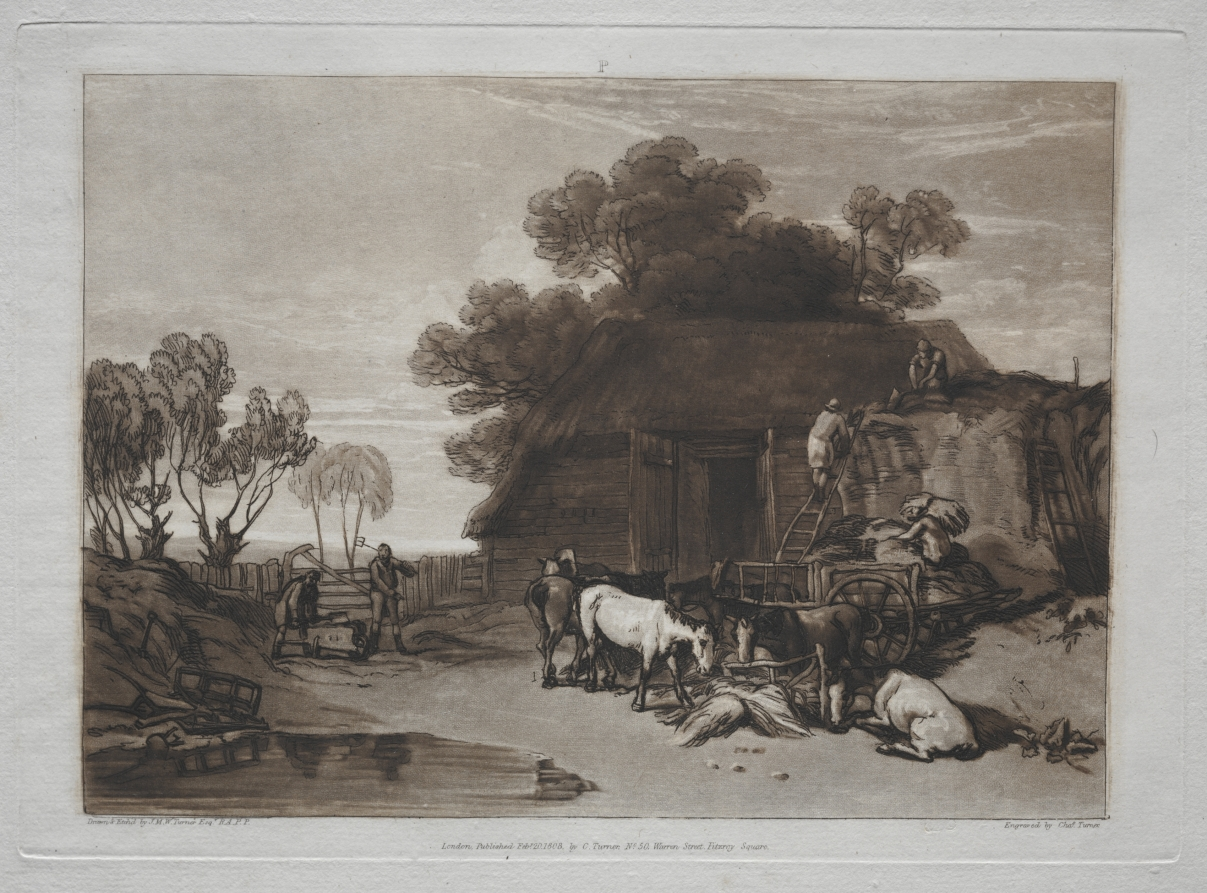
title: Liber Studiorum: The Straw Yard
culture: England, 19th century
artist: Joseph Mallord William Turner (British, 1775–1851)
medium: etching and mezzotint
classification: Print